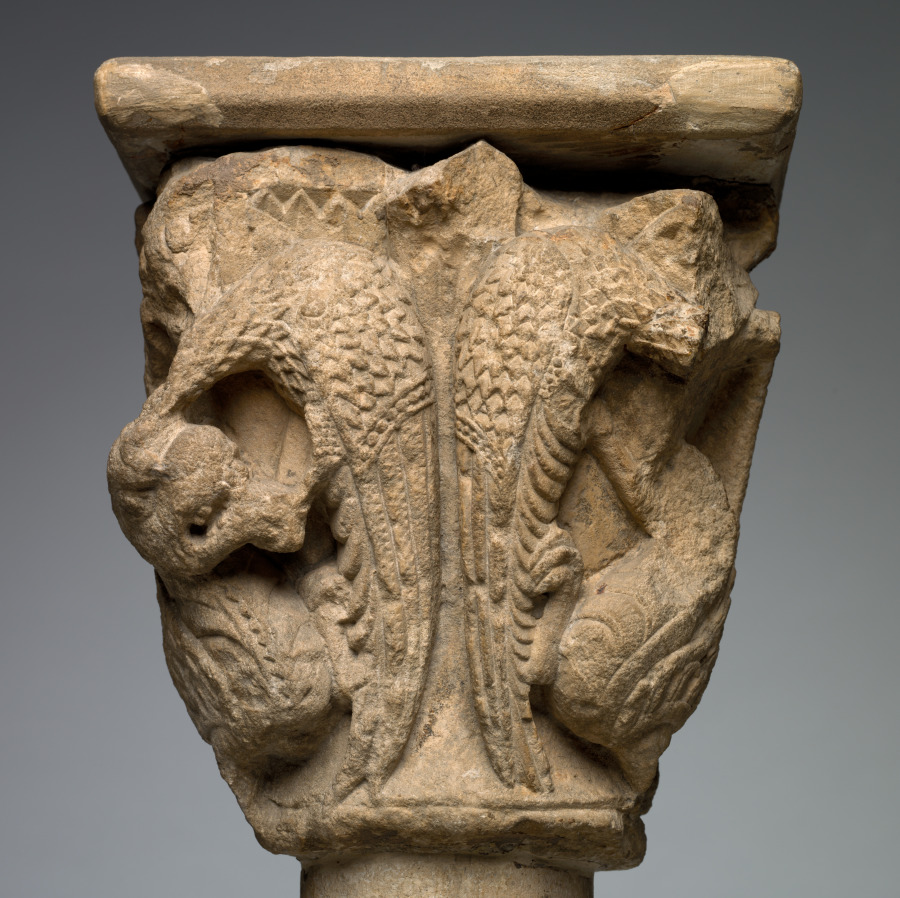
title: Engaged Capital with Birds and Dragons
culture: Western France, Bordelais or Dordogne, late 12th Century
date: late 1100s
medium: limestone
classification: Sculpture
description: Monstrous images were prevalent in the decoration of religious buildings during the Middle Ages. Such images must have impressed, perhaps even terrified, the monks and visitors who spent much of their time within the cloister or church, a place of prayer, contemplation, and reflection. Scholars have speculated how such images would have been received by the people given the ubiquity of monsters in medieval society. The carved monsters, often symbolizing vice and retribution for sin, were possibly designed to provoke a range of emotional responses including laughter, wonder, surprise, fear, and shock. This striking imagery must have had a strong impact, which in turn led Saint Bernard of Clairvaux (1090–1153), the spiritual head of the Cistercian order, to admonish their use as distracting from prayer.